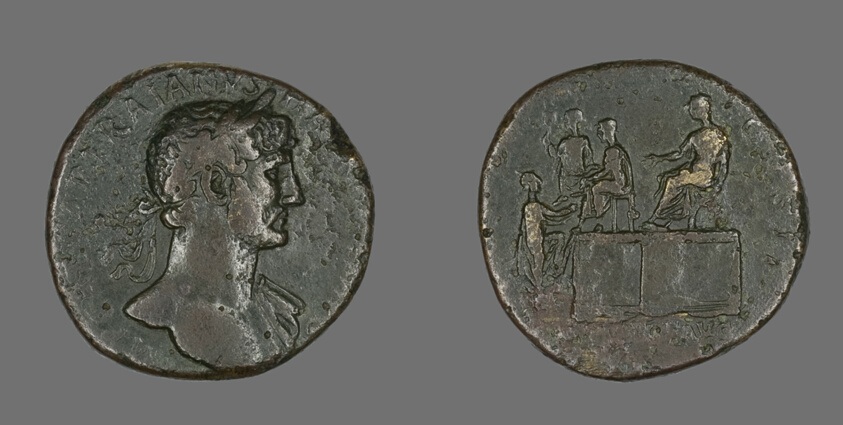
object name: Coin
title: Coin Portraying Emperor Hadrian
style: imperial (roman), ancient, roman (ancient, style or period)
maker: Roman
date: 118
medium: Bronze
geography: Roman Empire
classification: coin; struck; ancient art